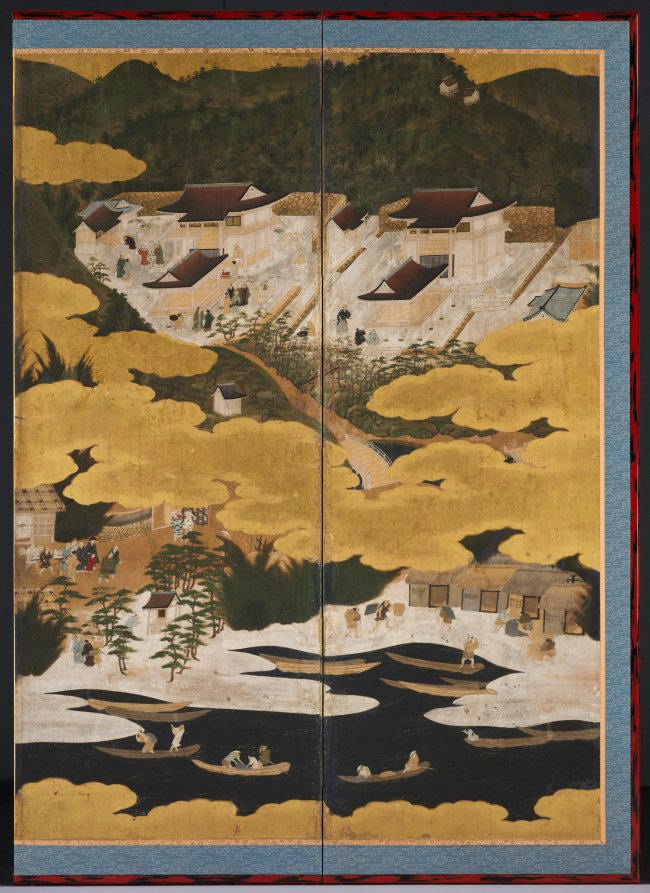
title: Famous Views of Ōmi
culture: Japan, Edo period (1615–1868)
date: 1660s–90s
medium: One of a pair of six-panel folding screens; ink, color, and gold on gilded paper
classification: Painting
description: Ōmi is an area around Lake Biwa near Kyoto. The Shinto shrine Hiyoshi Taisha and the Buddhist temple Ishiyamadera are in the upper right and upper left of the composition, respectively. At center is the pilgrimage route and people in the town before the temple gates. Harvested rice fields to the right and flowering cherry blossom trees at left show seasonal change from winter to spring.